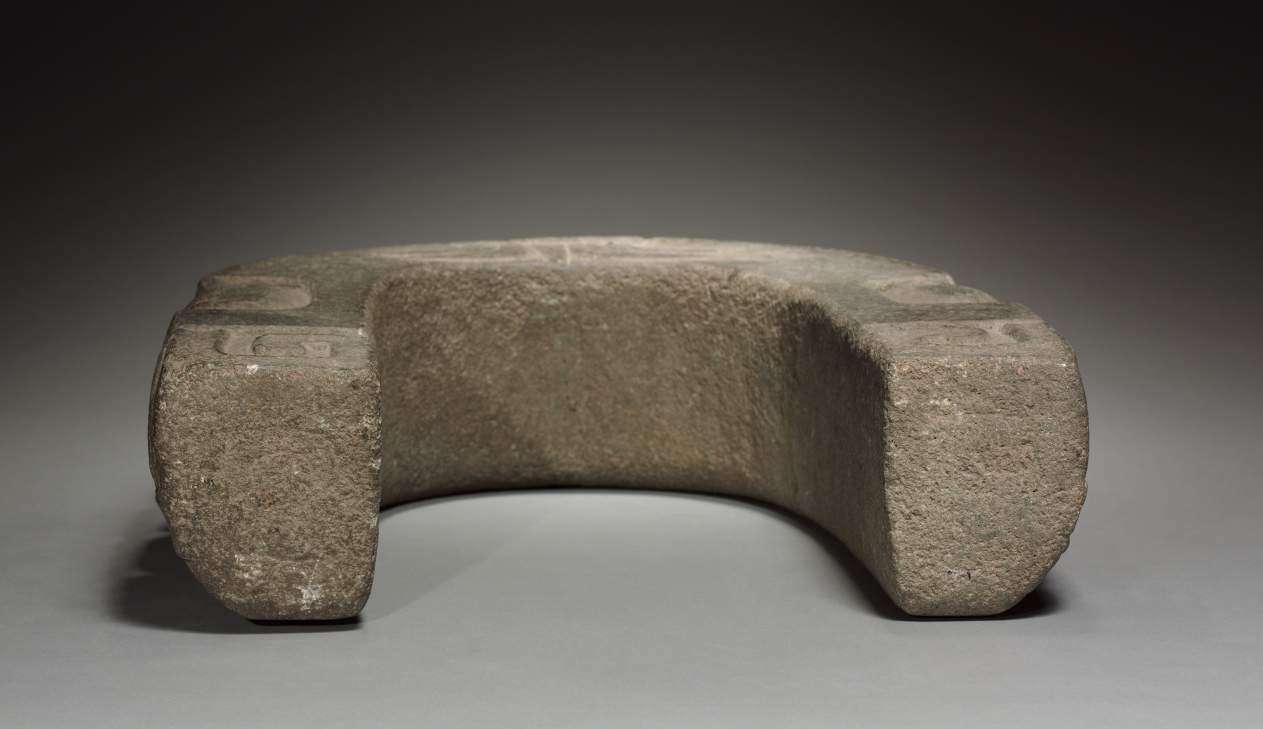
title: Yoke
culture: Mexico, Classic Veracruz Style, 7th-10th Century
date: c. 600–900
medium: stone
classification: Sculpture